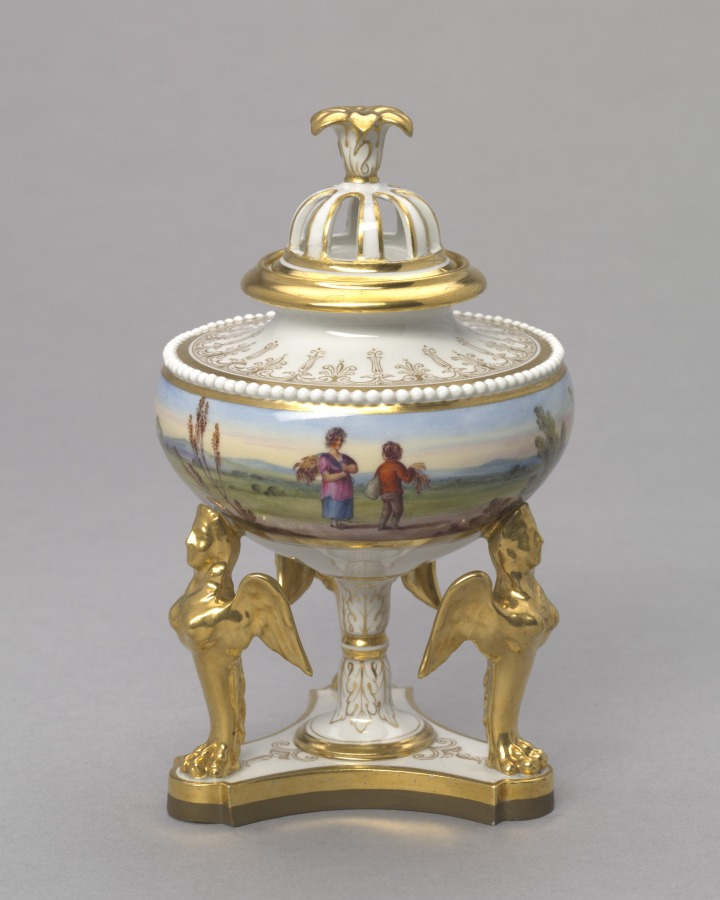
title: Urn and cover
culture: England, Worcester, 19th century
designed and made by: Flight, Barr and Barr (British)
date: c. 1815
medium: artificial porcelain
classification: Ceramic